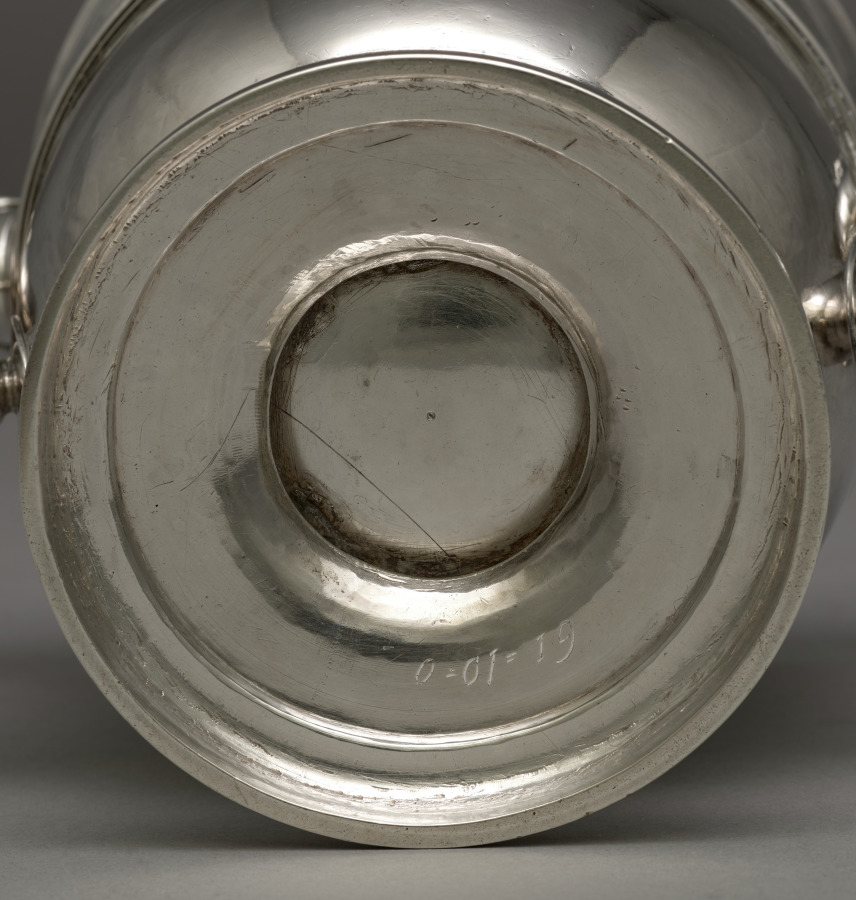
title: Two-Handled Cup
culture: England, London, 18th century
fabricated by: Anthony Nelme (British)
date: 1712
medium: silver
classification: Silver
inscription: engraved: coat of arms of Irvine of Bonshaw imaling O'Bryen.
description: Nelme was one of the most famous and successful native English silversmiths of a time when Huguenots (French Protestants) dominated the creation of richly decorated pieces for the most fashionable market.